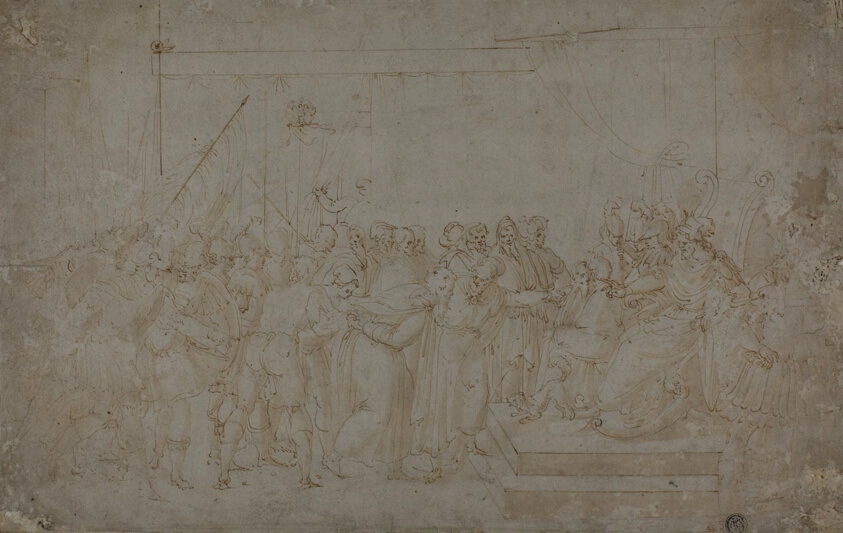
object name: Drawing and Watercolor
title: Saint Peter Brought before Nero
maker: Ercole Setti (Italian, 1530-1617)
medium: Pen and brown ink with brush and pale brown wash, with traces of black chalk, on ivory laid paper, laid down on ivory laid paper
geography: Italy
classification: ink with wash; drawings (visual works); prints and drawing